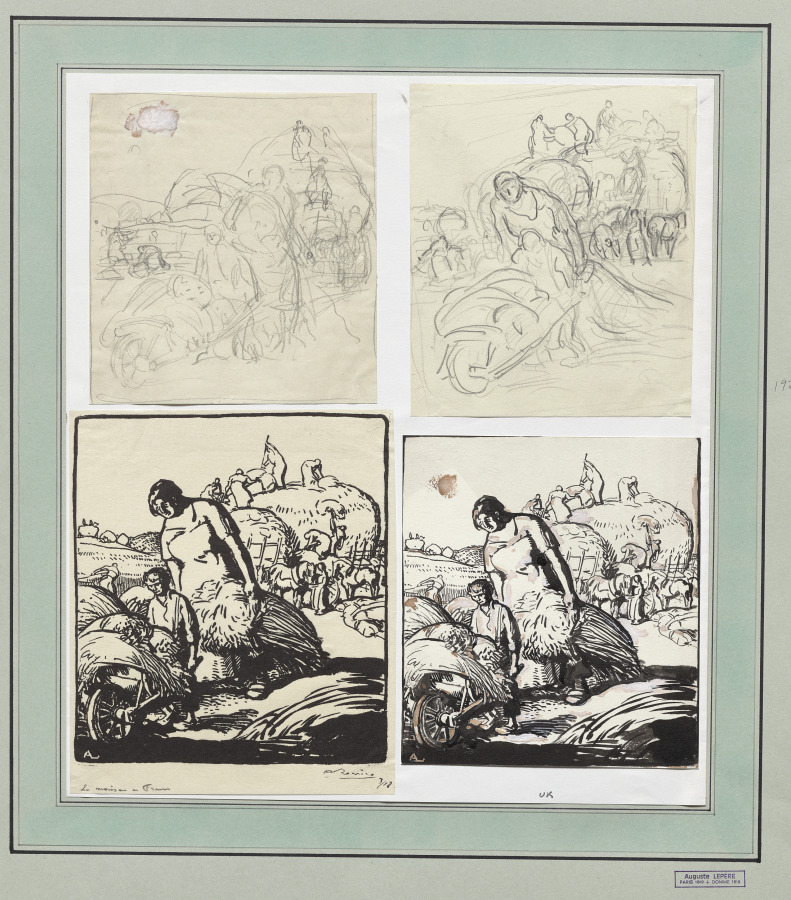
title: La Moisson en France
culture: France, 20th century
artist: Auguste Louis Lepère (French, 1849–1918)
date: 1914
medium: pencil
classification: Drawing